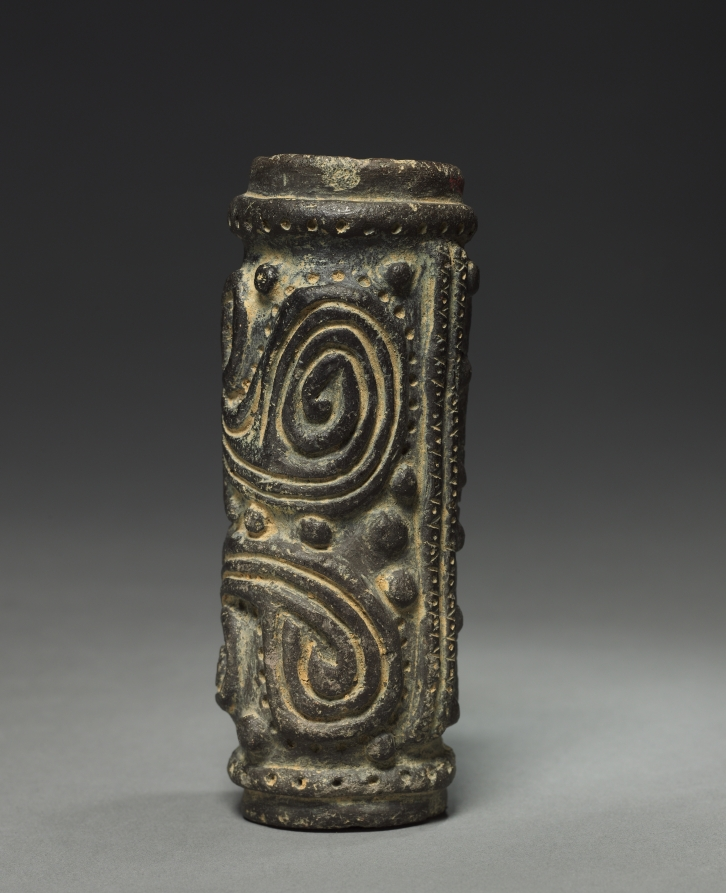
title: Roller Stamp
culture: Colombia, 19th-20th century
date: before 1921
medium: black ware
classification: Ceramic